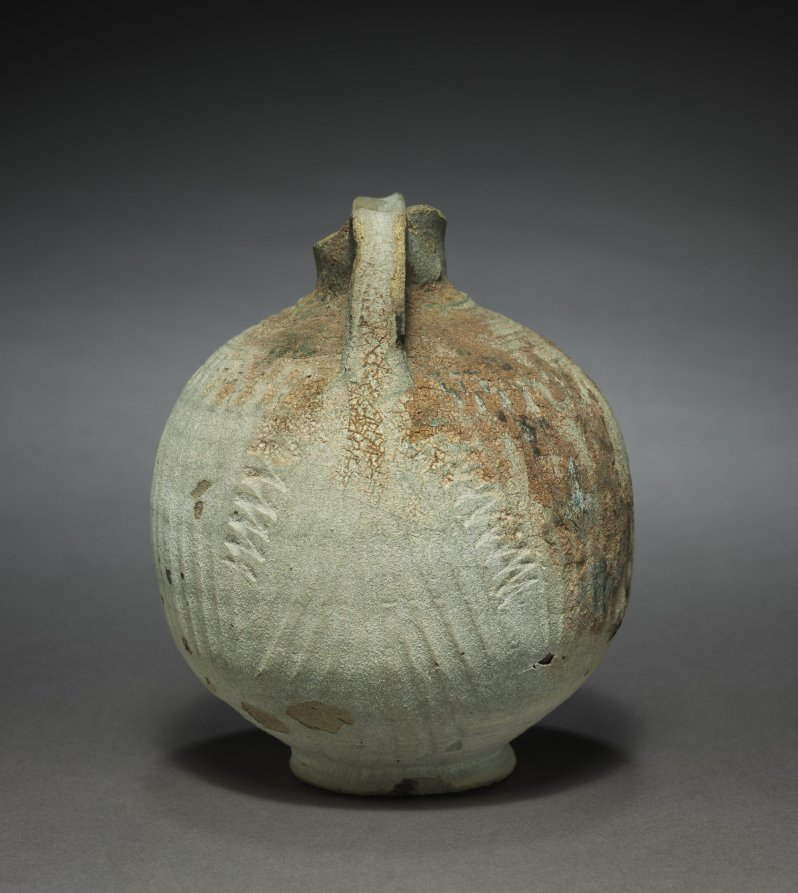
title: Jar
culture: Parthian Empire (247 BCE–224 CE)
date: 1–200 CE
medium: terracotta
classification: Ceramic